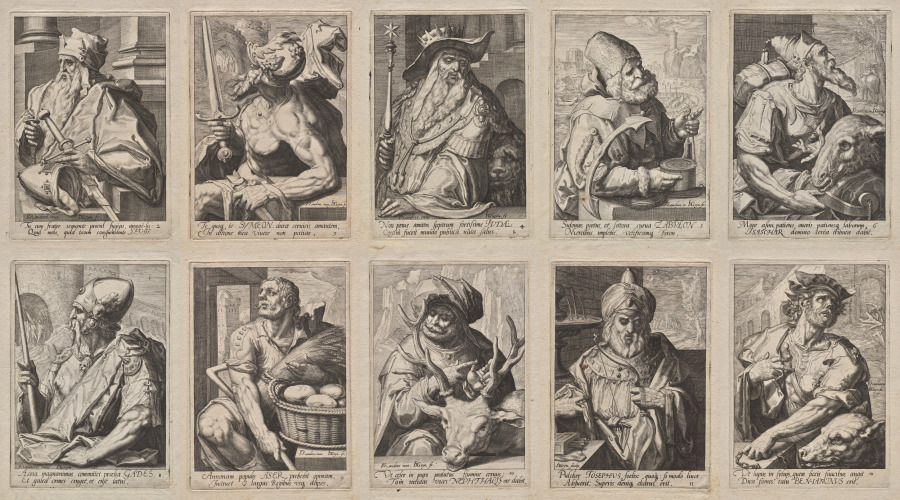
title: The Twelve Sons of Jacob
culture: Netherlands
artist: Jacob de Gheyn II (Netherlandish, 1565–1629)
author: after Karel I van Mander (Netherlandish, 1548–1606)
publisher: Jan Pitten (Dutch, active Amsterdam, 1588–1592)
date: c. 1589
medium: Set of 10 engravings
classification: Print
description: This series of prints presents the 12 sons of Jacob, each with an attribute and costume that denotes his character. According to the Old Testament, Jacob blessed each of his 12 sons, prophesizing the destiny of their tribe, and assigning them a parcel of land in Canaan (present-day Israel). The print series was made in the Netherlands in the late 1500s, a time of political struggle when Old Testament heroes were popular exemplars of fortitude and patience. The set includes Levi, Simeon, Judah, Zabulun, Isaacher, Gad, Asher, Naphtali, Joseph, and Benjamin. The CMA's set is lacking the plates for Dan and Ruben.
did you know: Among the attributes for each of Jacob's sons are the crown of Judah, symbolizing his status as ancestor of Kings David and Solomon, and a flowing fountain for Joseph, referring to Joseph's blessing of a double inheritance from his father.